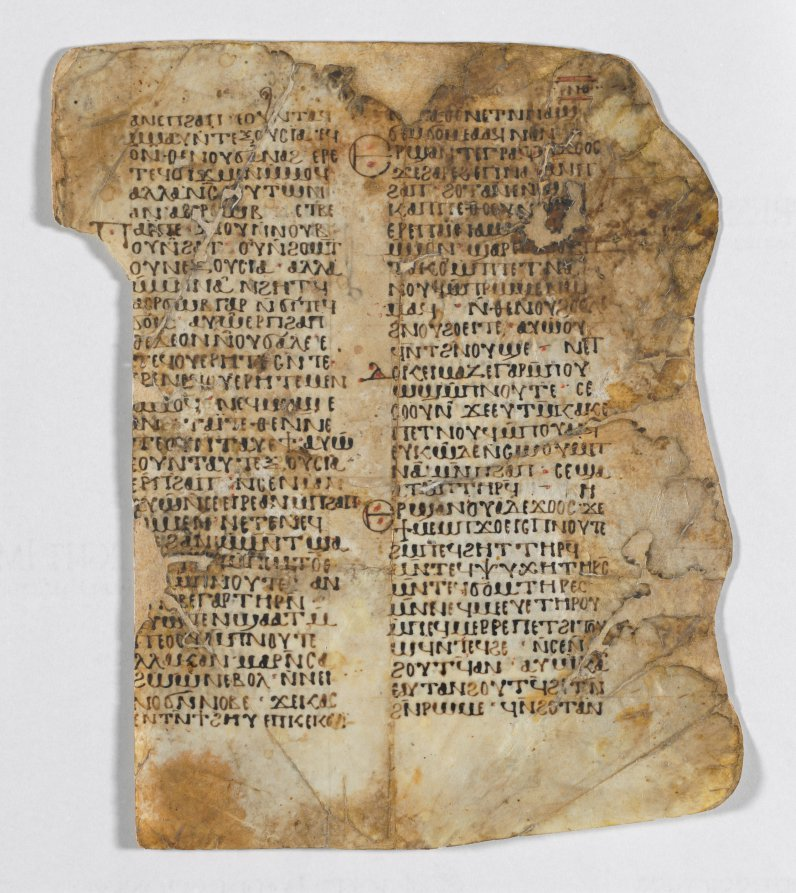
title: Leaf from a Christian Homily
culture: Egypt, Coptic period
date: 500s-600s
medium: ink on vellum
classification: Manuscript